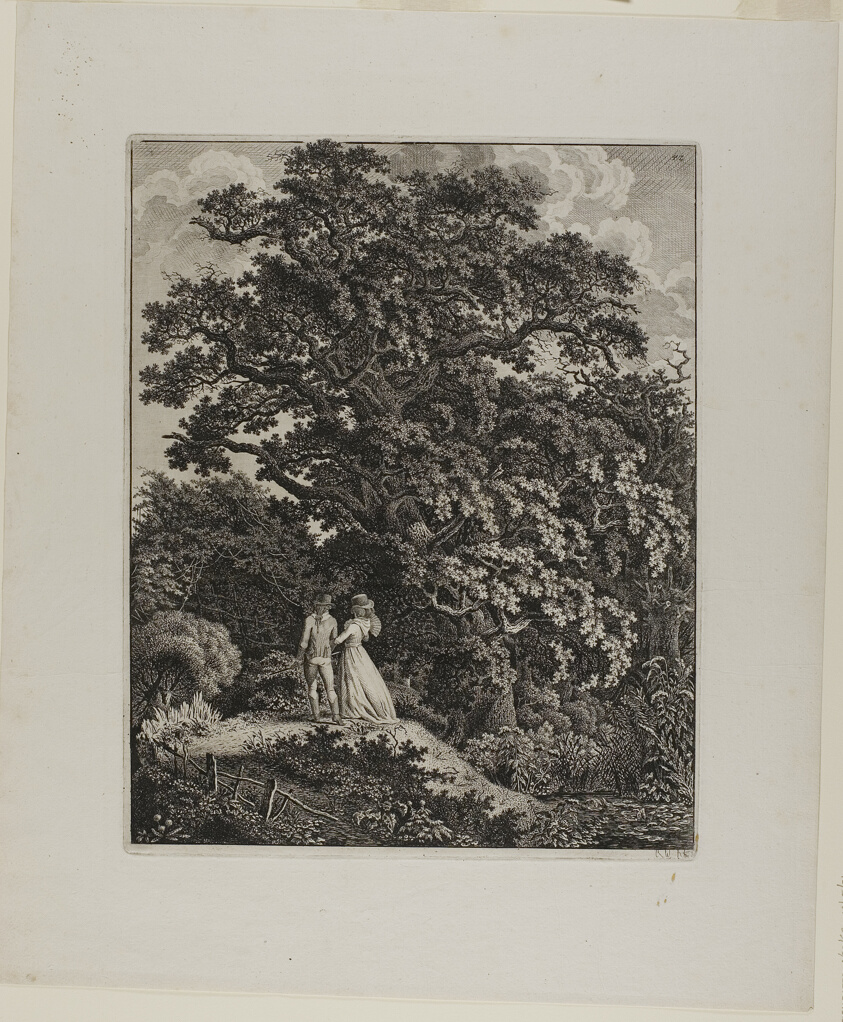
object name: Print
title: Woodland Landscape with an Elegant Couple Walking Beneath an Oak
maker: Carl Wilhelm Kolbe, the elder (German, 1759-1835)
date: 1796/1800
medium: Etching on ivory laid paper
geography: Germany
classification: etching; print; prints and drawing